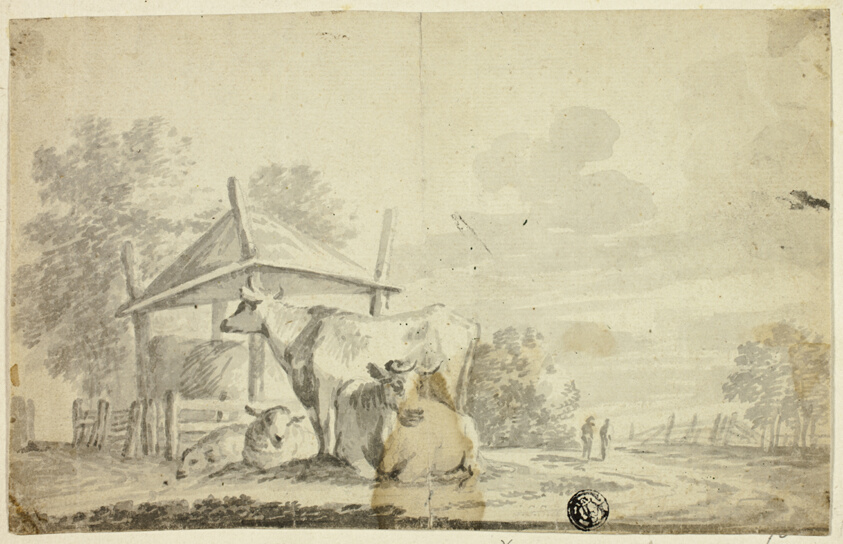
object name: Drawing and Watercolor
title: Cows and Sheep at Cow Shed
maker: Style of Albert Jansz. Klomp (Dutch, c. 1618-1688/89)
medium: Brush and gray wash, over traces of black chalk, on ivory laid paper, tipped onto ivory wove paper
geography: Holland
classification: ink or chalk wash; drawings (visual works); prints and drawing